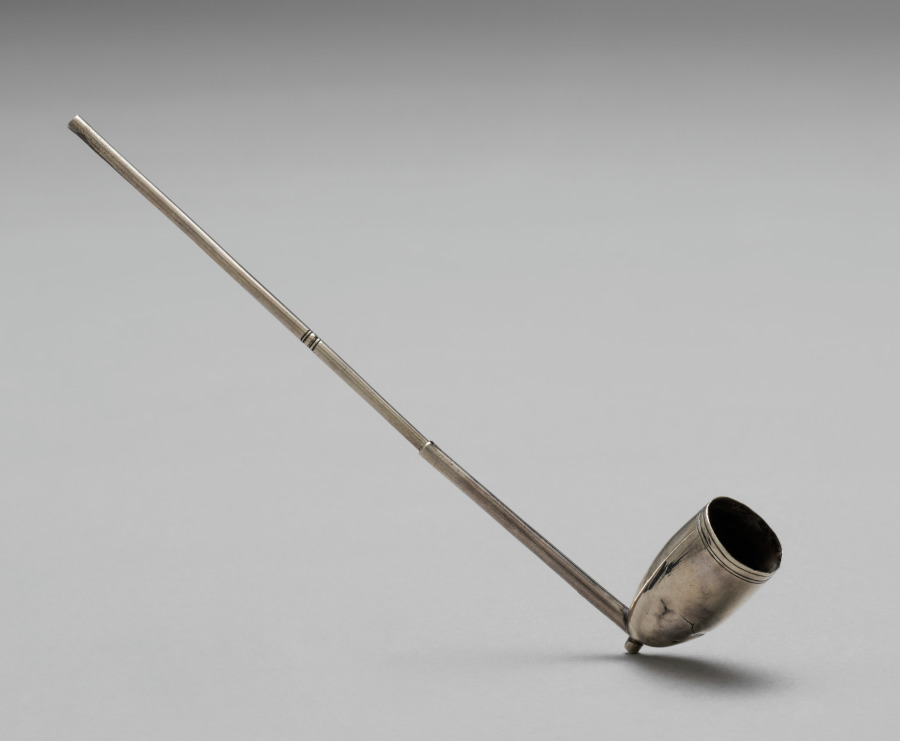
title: Pipe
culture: America, late 18th - early 19th century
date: late 1700s - early 1800s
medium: silver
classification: Silver